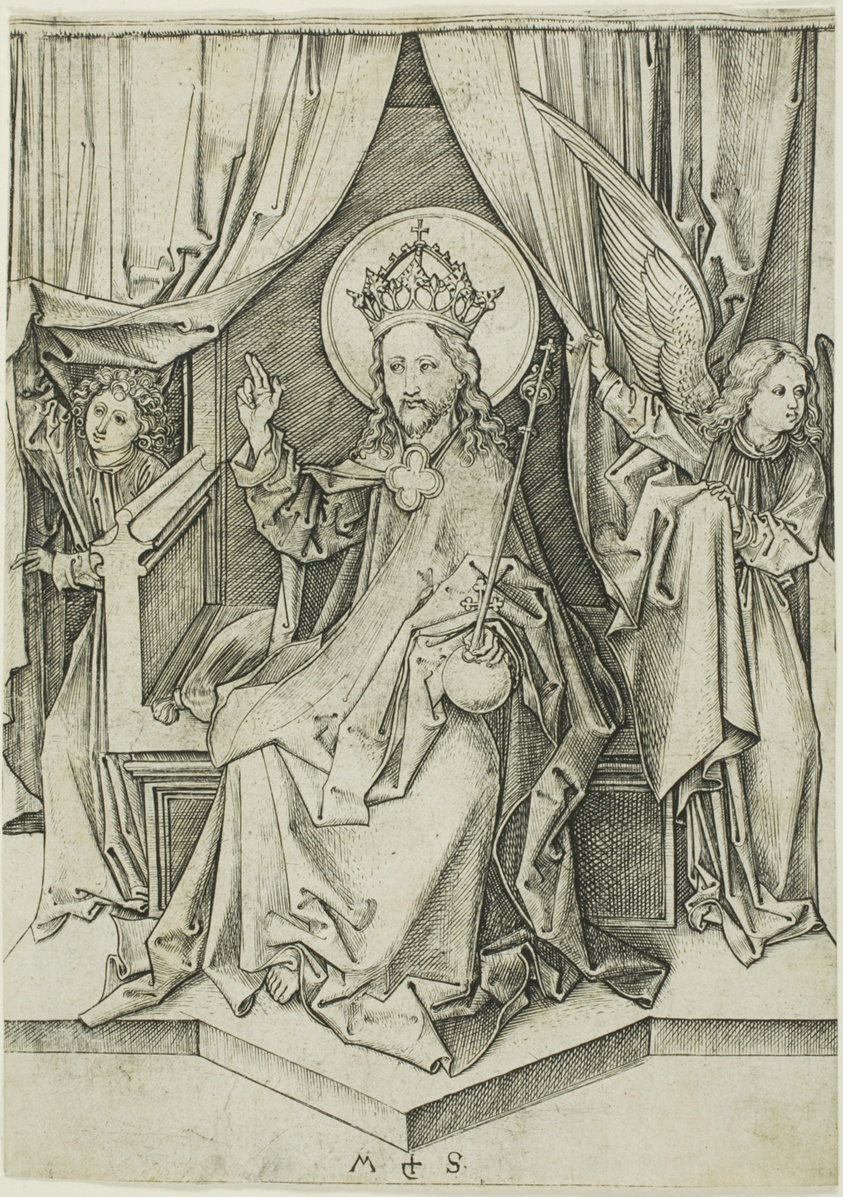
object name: Print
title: Christ Enthroned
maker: Martin Schongauer (German, c. 1430/50-1491)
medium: Engraving on paper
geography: Germany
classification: engraving; print; prints and drawing